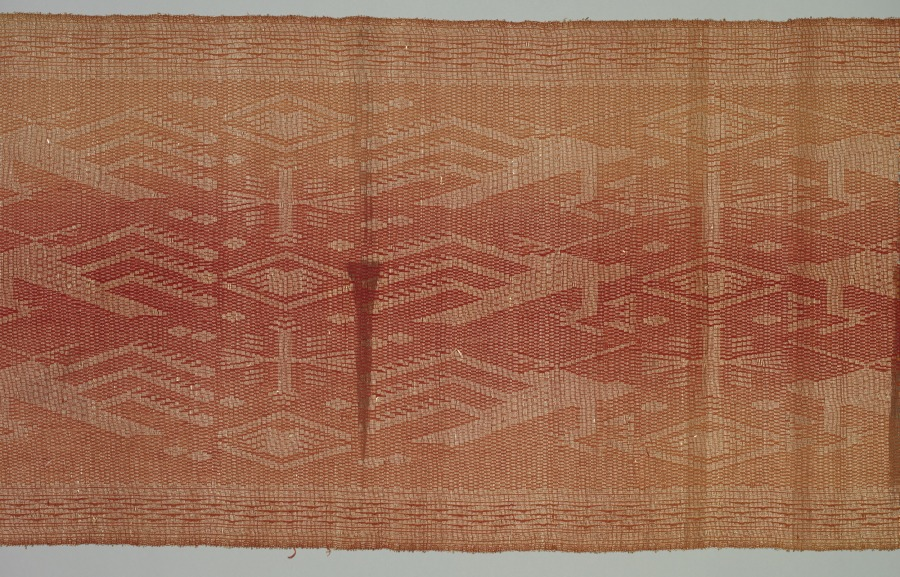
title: Brocade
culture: Indonesia, Sumatra, Minangkabau, late 19th century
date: late 1800s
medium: brocade; silk and metal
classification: Textile